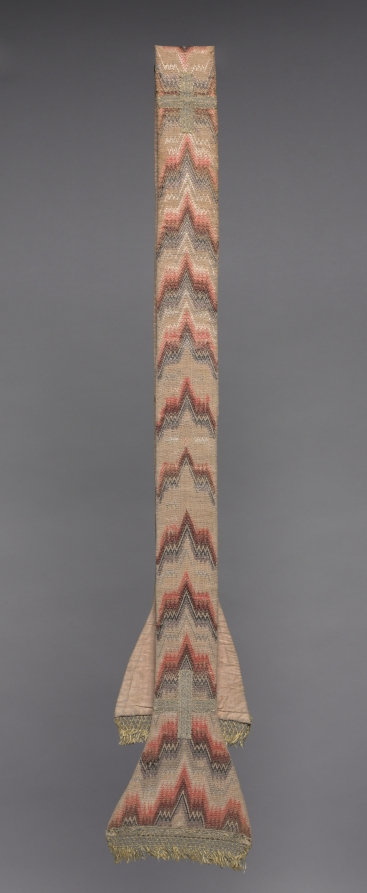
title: Embroidered Stole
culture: Italy, 19th century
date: 1800s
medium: bargello, silk on linen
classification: Embroidery